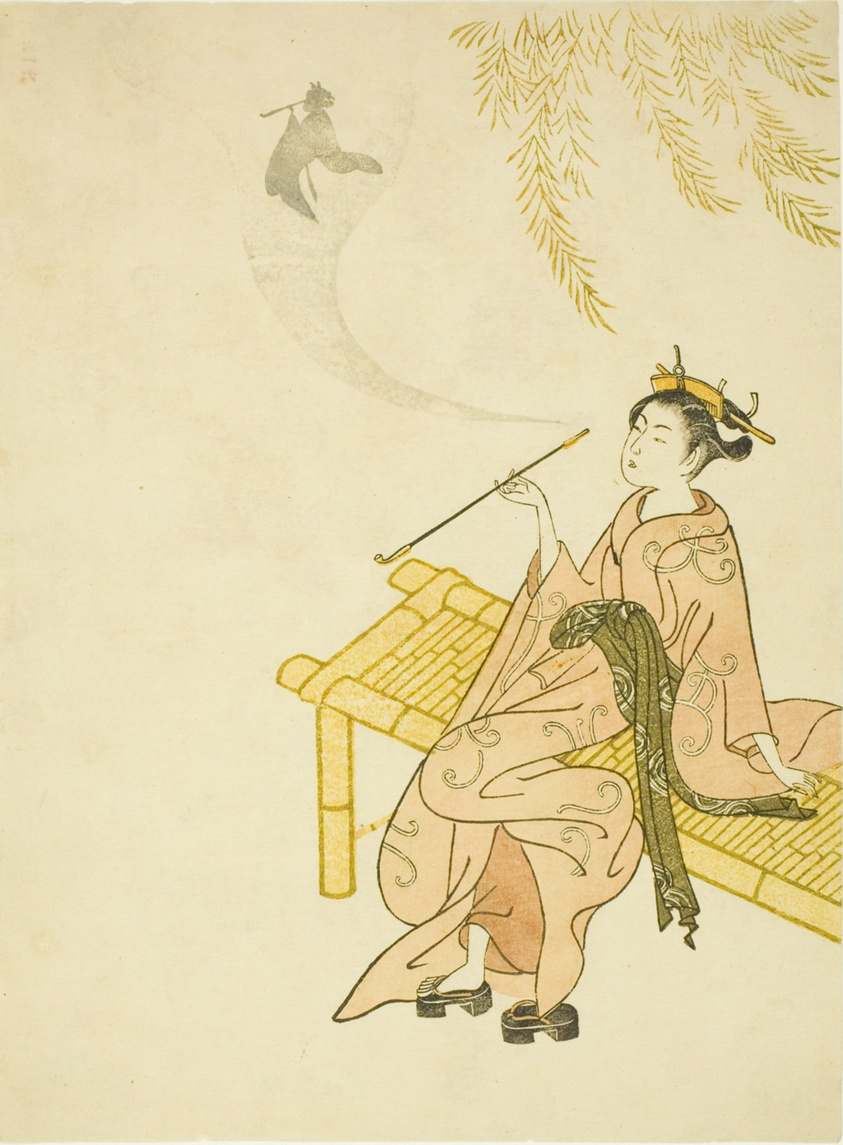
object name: Print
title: Smoking on a Bench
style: Japanese (culture or style)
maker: Attributed to Suzuki Harunobu 鈴木 春信; Japanese, 1725 (?)-1770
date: 1765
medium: Color woodblock print; chuban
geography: Japan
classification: woodblock print; print; asian art